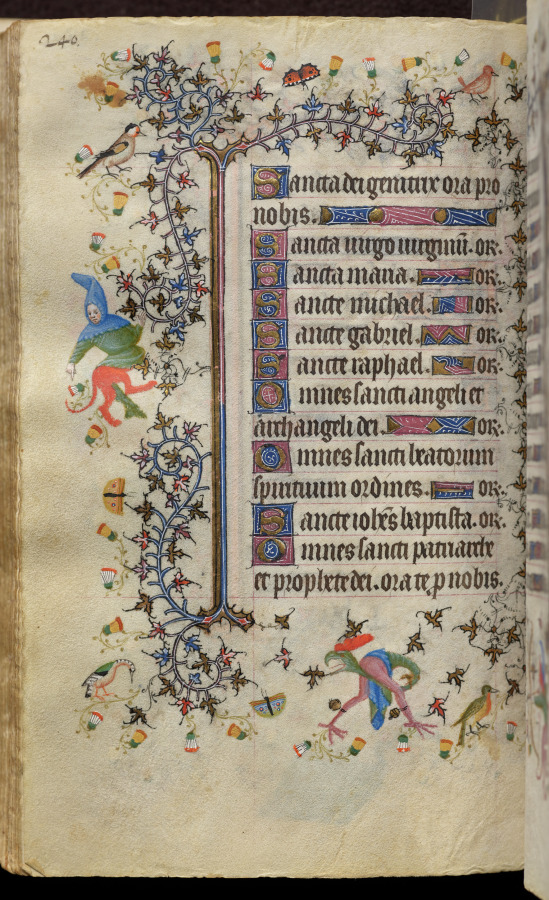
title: Hours of Charles the Noble, King of Navarre (1361-1425): fol. 120v, Text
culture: France, Paris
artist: Master of the Brussels Initials and Associates (French)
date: c. 1405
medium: ink, tempera, and gold on vellum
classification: Bound Volume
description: This precious volume was obviously highly prized by its owner, the French-born King of Navarre, who had his coat of arms painted on no less than twenty folios. Rather than directly commissioning this manuscript from a specific workshop, it seems that Charles the Noble acquired his book of hours -- perhaps ready-made for the luxury market -- while on a trip to Paris in 1404-05. A collaborative effort, six painting styles are evidenced within the pages of this codex, those of two Italians, two Frenchmen, and two Netherlanders. The painter who was responsible for the planning and decoration of the book, and who produced seventeen of the large miniatures, was a Bolognese artist known as the Master of the Brussels Initials. His principal assistant, responsible for most of the borders, was a Florentine who signed his name "Zecho" da Firenze on folio 208 verso.